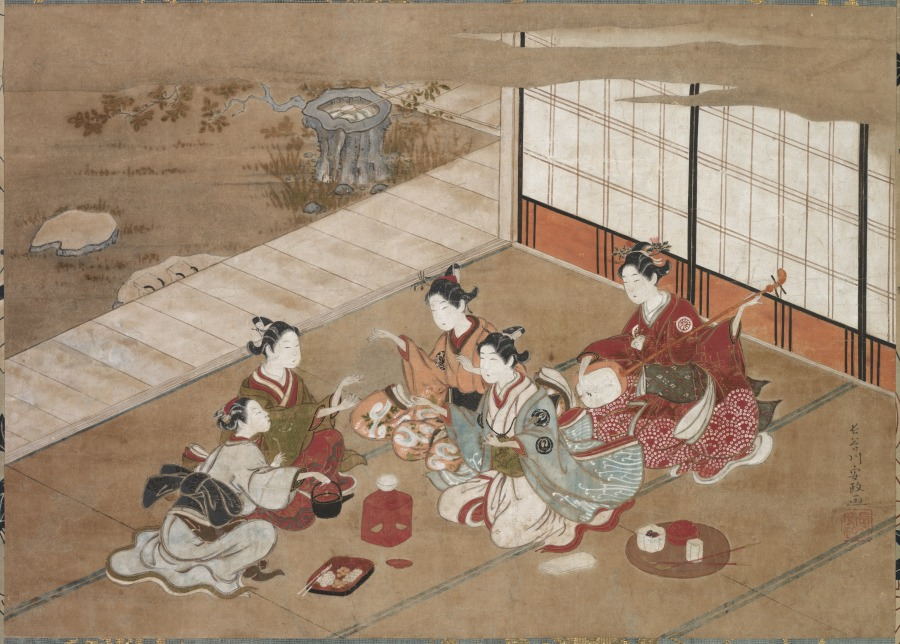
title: Playing the "Hand Game"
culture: Japan, Edo period (1615–1868)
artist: Hasegawa Yasumasa (Japanese)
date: c. 1760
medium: hanging scroll; ink and color on paper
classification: Painting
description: This scene depicts three people playing a game in which three players make hand gestures simultaneously. The relationship among the gestures determines the winner. Known as hand games, during the eighteenth century they were popular in Japan among courtesans. In this version, the contestants use both hands, indicating a special variation such as the fox hand game, which features gestures for a fox, a village leader, and a hunter.